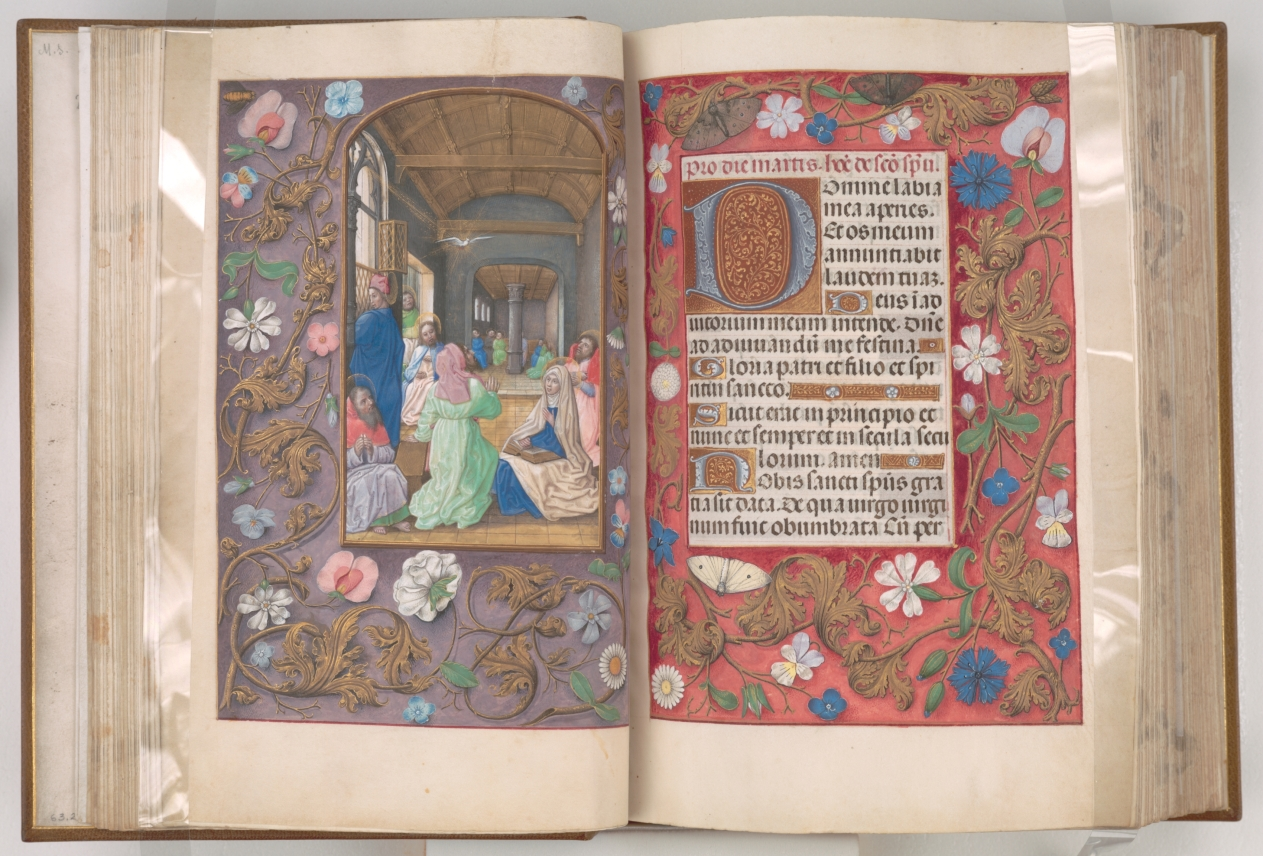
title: Hours of Queen Isabella the Catholic, Queen of Spain: Fol. 32r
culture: Flanders, Ghent and Bruges, late 15th century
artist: Master of the First Prayerbook of Maximillian (Flemish, c. 1444–1519)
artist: and Associates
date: c. 1500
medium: ink, tempera, and gold on vellum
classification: Bound Volume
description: A great lover of Flemish art, Queen Isabella treasured her many devotional books. This deluxe manuscript was created for her private devotions by highly organized and distinctly talented manuscript painters active in Ghent and Bruges. The Ghent-Bruges school represents the culmination of Flemish book painting, whose main features were the use of rich colors, illusionistic effects, a love of landscape, and a strong sense of visual narrative. Manuscripts produced by this circle of artists are renowned for their border decoration featuring a rich variety of realistically painted flowers, scrolling acanthus leaves, birds, and butterflies.